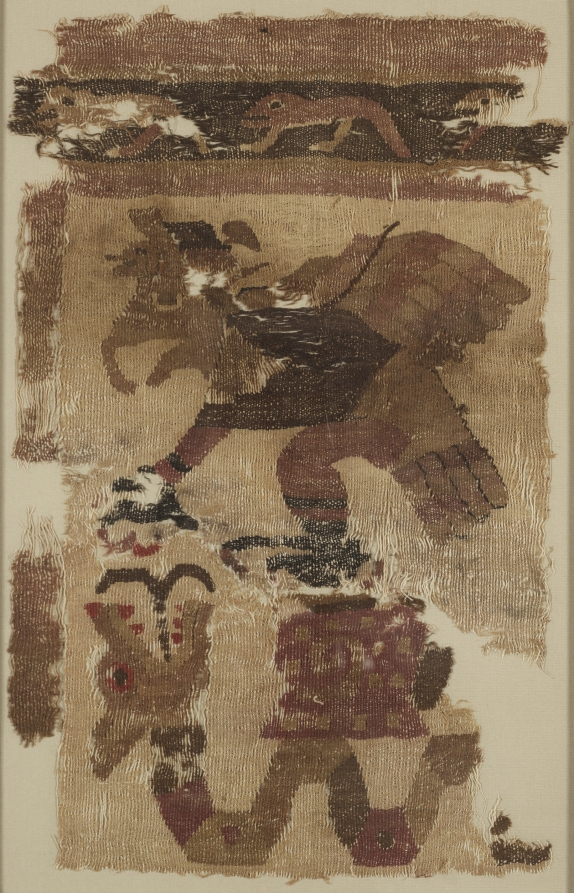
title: Textile Fragment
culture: Peru, Moche, north coast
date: c. 50–650 CE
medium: cotton and camelid fiber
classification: Textile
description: This fragment, one of several in the collection, is a rare survivor of catastrophic rains that destroyed much of the Moche textile legacy and may have helped to bring about the decline of Moche culture. It depicts a serpent and a snail beneath a hovering raptorial bird—perhaps a snail kite, a type of hawk named after its favored food. The size of the motifs implies that the original textile was large; a mantle (a shawl-like garment) or a hanging are among the possibilities.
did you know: This fragment is a rare survivor of floods that destroyed much of the Moche textile record.